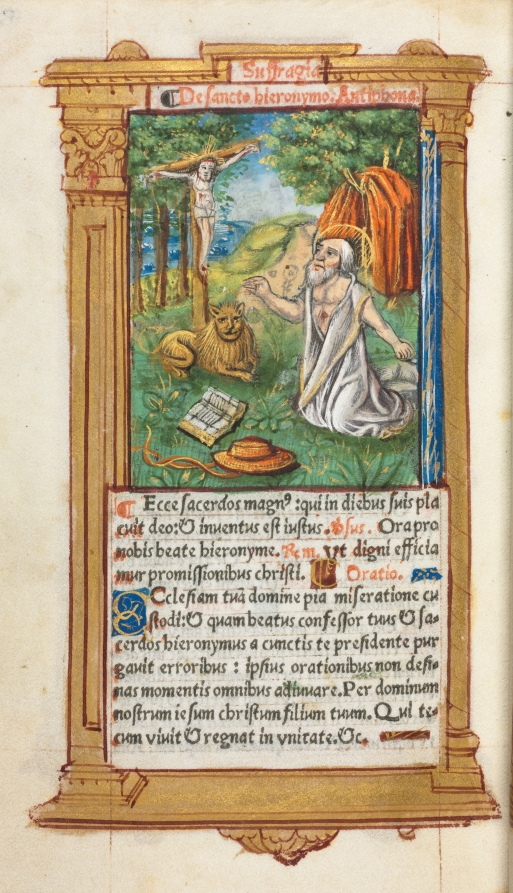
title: Printed Book of Hours (Use of Rome): fol. 107v, St. Jerome and the Lion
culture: France, Paris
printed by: Guillaume Le Rouge (French, Paris, active 1493–1517)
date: 1510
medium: 112 Printed folios on parchment, bound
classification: Bound Volume